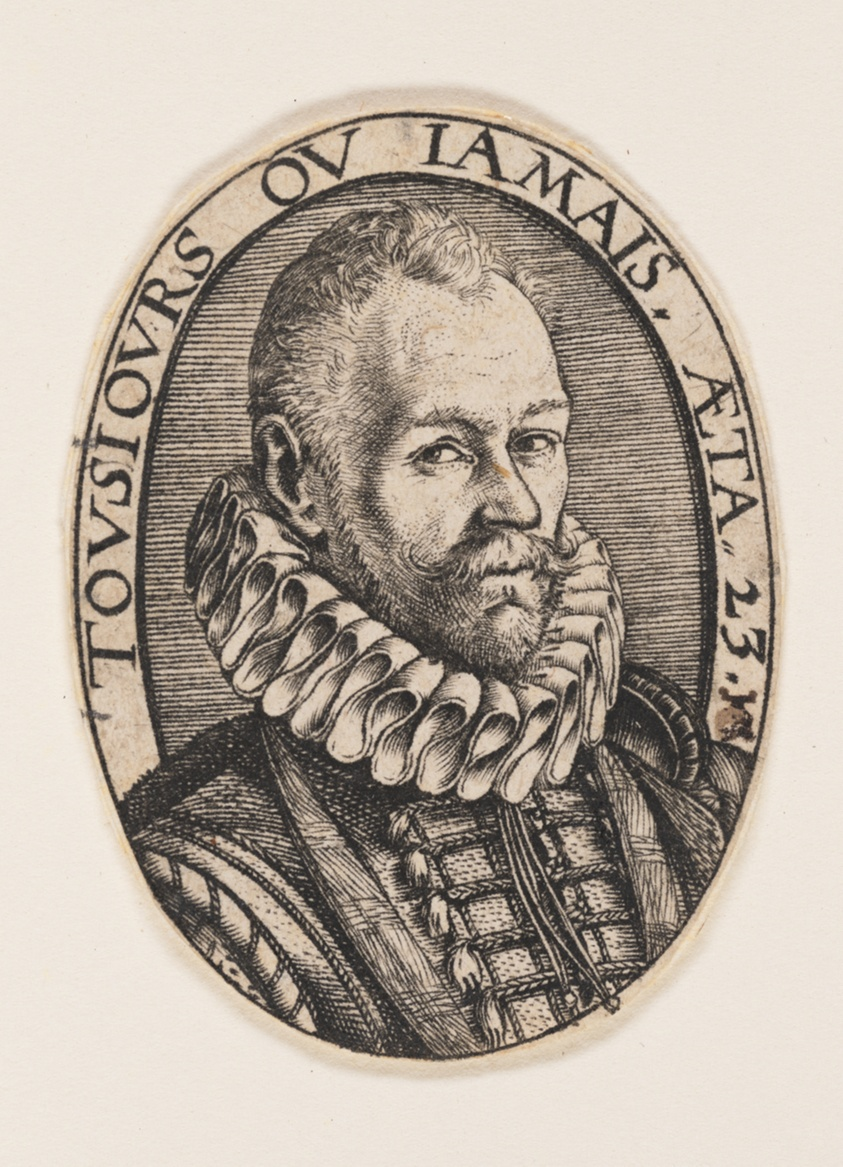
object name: Print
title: Arnout van Beresteyn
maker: Hendrick Goltzius (Dutch, 1558–1617)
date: 1579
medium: Engraving on paper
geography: Netherlands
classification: engraving; paper; print; prints and drawing